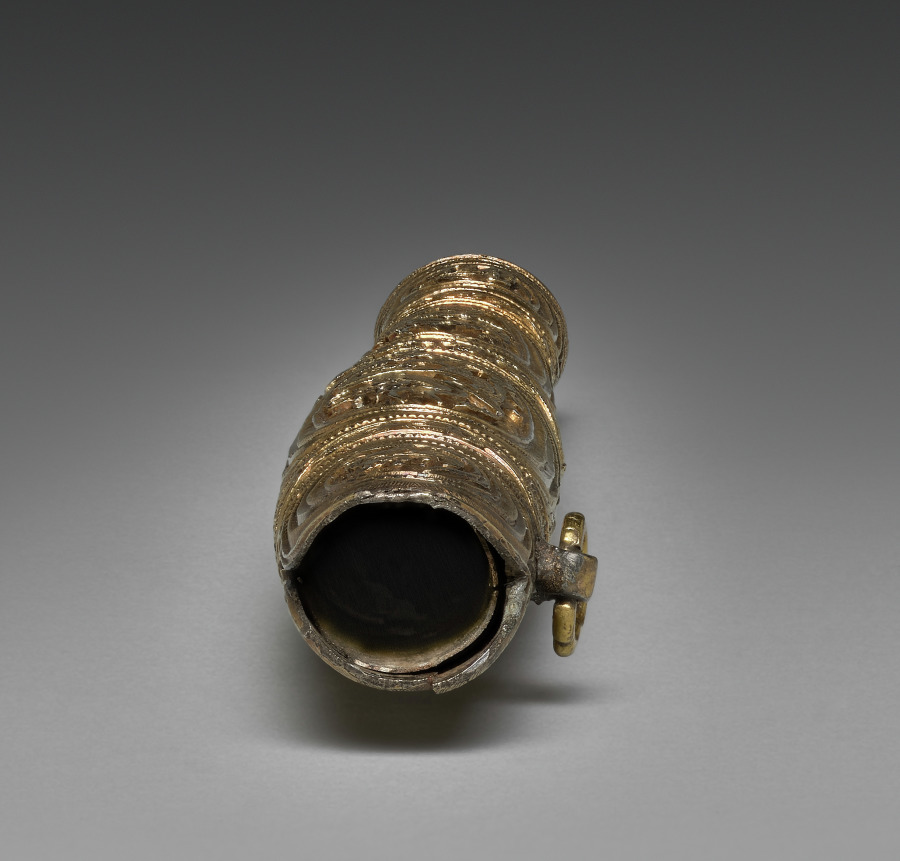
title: Knife Sheath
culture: Korea, Goryeo dynasty (918–1392)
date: 1100s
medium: Gilt silver (body) and brass (trefoil-shaped ring)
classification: Metalwork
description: Made by rolling a flat piece of silver plate, this knife sheath is decorated on each side with oval panels, including two larger middle panels showing an image of rising dragons with ring-punched scales. The circular upper panels bear the image of seated phoenixes. The flat bottom is engraved with a pair of fish, symbolizing harmonious unity. The trefoil-shaped ring attached to the tip of the sheath allows a string to connect it as a pendant to a belt. In medieval Korea, a miniature sheath such as this was considered an important fashion item, especially for elite members of the ruling class.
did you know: This 12th-century silver-gilt knife sheath is meant to be a pendent to a belt as a luxury ornament.